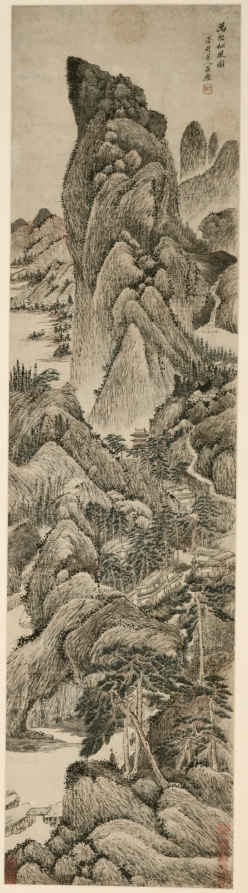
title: Pine Wind from Myriad Villages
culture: China, Qing dynasty (1644-1911)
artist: Wu Li (Chinese, 1632–1718)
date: late 1600s–1718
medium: Hanging scroll; ink and light color on paper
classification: Painting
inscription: Artist's title, signature, and 2 seals: Pine Wind from Myriad Valleys. Mojing daoren Wu Li.[seals] Mojing daoren; Wu Li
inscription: 5 additional seals: 2 of Fang Guancheng 方觀承 (1698–1768); 1 of Ma Chi-tso (1900s); 2 unidentified.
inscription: Two seals of the Qianlong emperor [r. 1736–95], probably authentic, were believed spurious and removed by a previous owner.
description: Wu Li, a native of Jiangsu province, was a talented painter, poet, and calligrapher. He studied painting with Wang Jian (1598–1677) and Wang Shimin (1592–1680), two of the “Four Wangs,” leaders of the Orthodox school of painting in the early Qing period. Through them, he also absorbed styles of earlier Ming dynasty masters. Wu was highly praised by his contemporaries and his paintings were in demand, but his interest in philosophy and religion curtailed his painting activities later in life. Wu Li converted to Christianity and in 1688 was ordained as one of the first 3 Chinese Jesuit priests. He spent the final 30 years of his life primarily in missionary work with the poor. Although this painting is undated, the sooty blackness of the ink tones and the easy self-confidence with which they are set down on paper echo recognized late works.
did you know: A figure carrying a qin, zither, walks between the buildings, perhaps intending to play music for the two men seated beneath the pines.